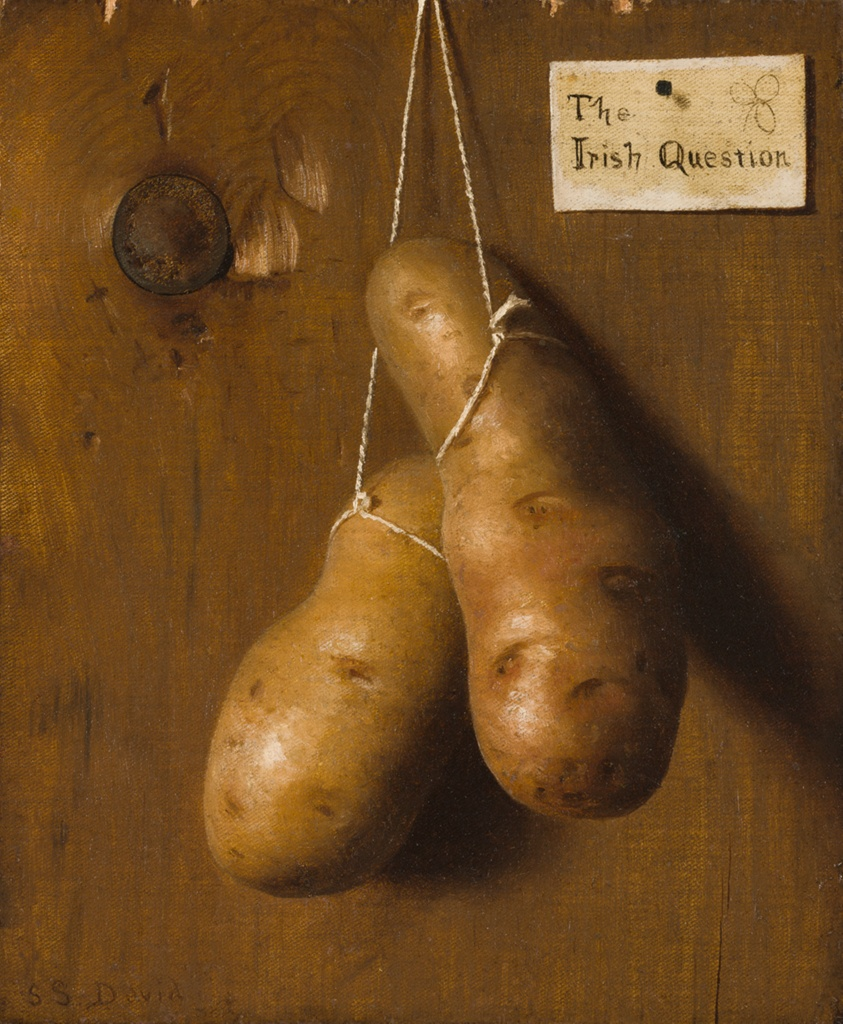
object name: Painting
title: The Irish Question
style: Realism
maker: De Scott Evans (American, 1847–1898)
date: 1880s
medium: Oil on canvas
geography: United States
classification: painting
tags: still life, potatoes, potato